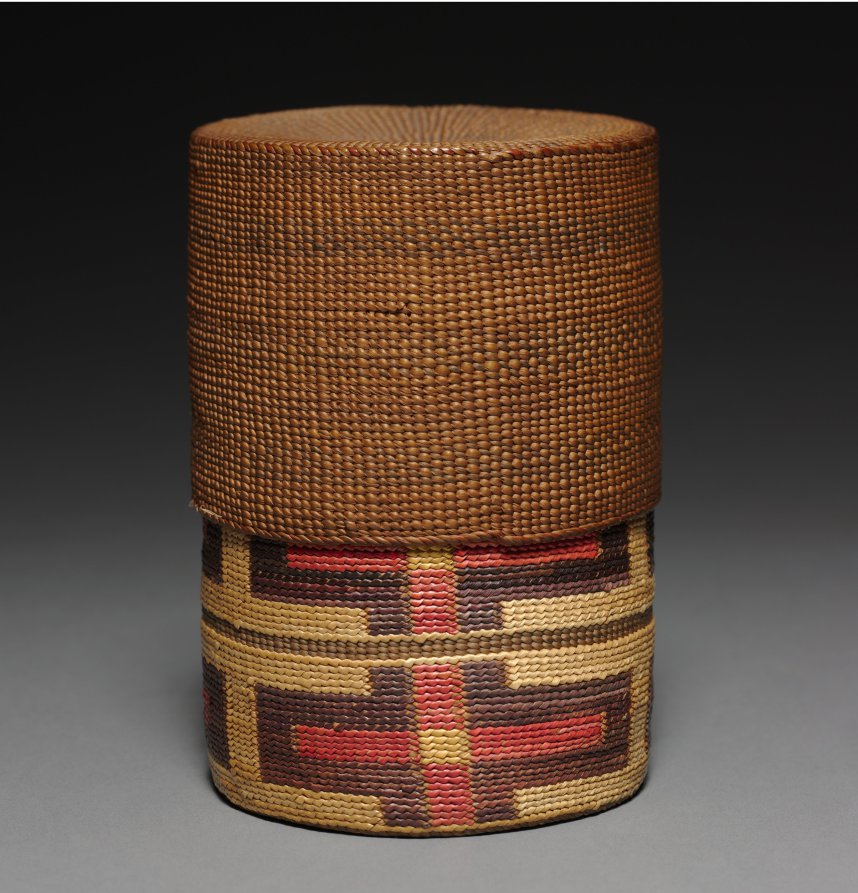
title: Telescoping basket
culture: Northwest Coast, Tlingit, 19th century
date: 1800's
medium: twined spruce root with grass false embroidery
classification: Basketry